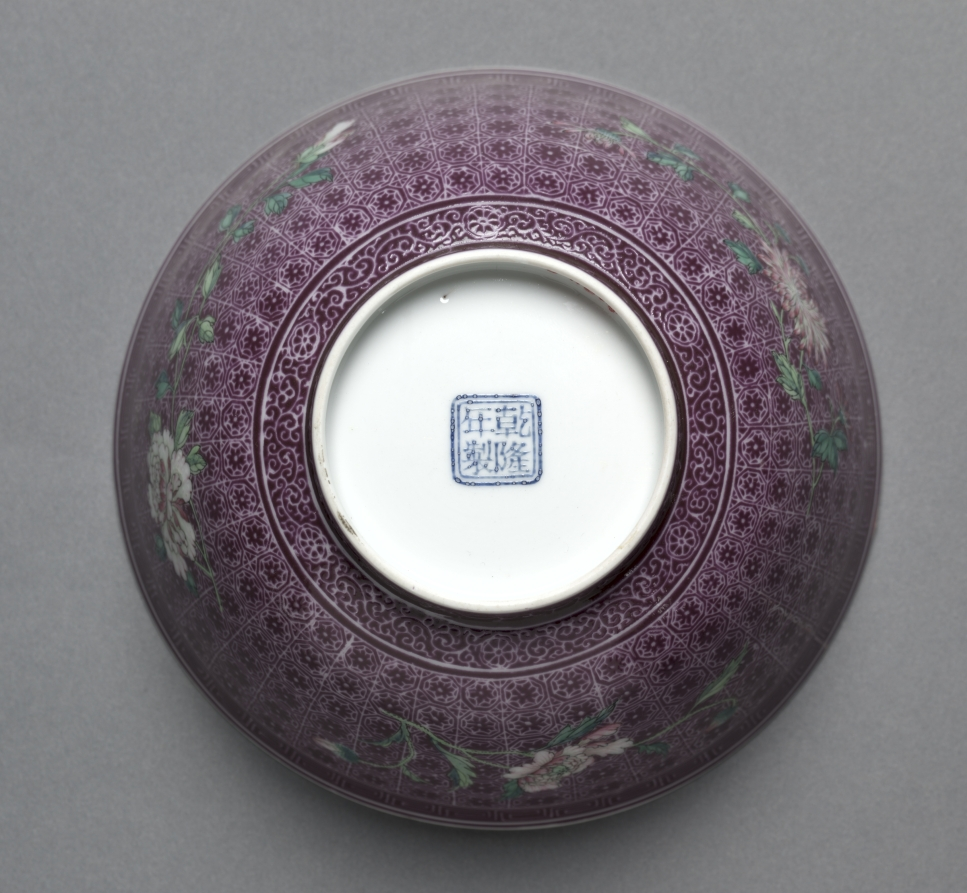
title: Bowl with Peony Sprays on Diaper Ground (exterior); Chrysanthemum Sprays (interior)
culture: China, Jiangxi Province, Jingdezhen, Qing dynasty (1644–1911), Qianlong mark and reign (1736–95)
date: 1736–95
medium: porcelain with famille rose overglaze enamel decoration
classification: Ceramic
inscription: 乾隆年製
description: The production of extraordinarily refined Qing imperial wares such as these could have involved the transportation of undecorated, plain porcelains from the imperial kilns in Jingdezhen, Jiangxi province, to the palace workshops in Beijing, where court painters applied the polychrome enamel decoration. The Qianlong reign mark on the base of the bowl is written with blue enamel over the transparent glaze.